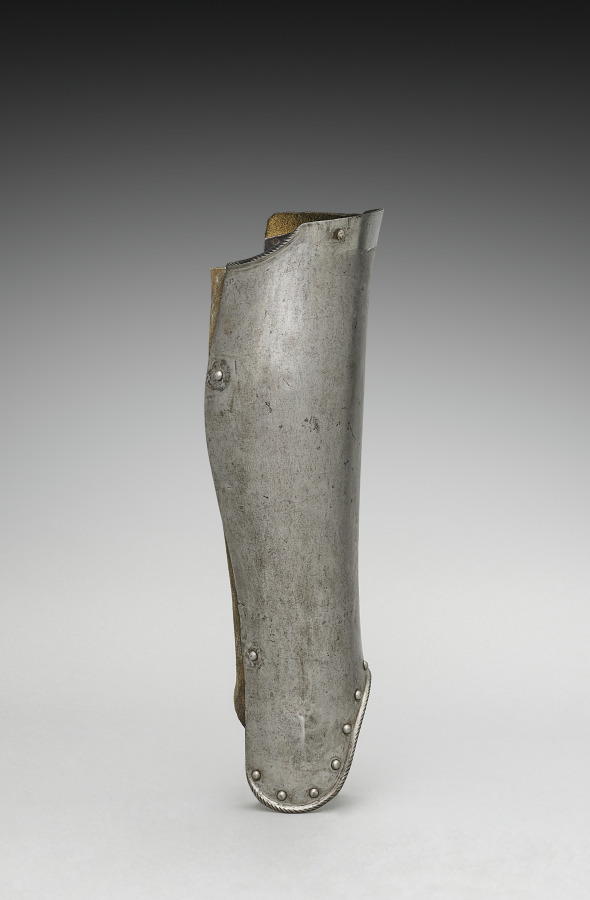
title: Right Greave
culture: Germany, 19th century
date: 1801–1900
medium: steel with black paint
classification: Arms and Armor